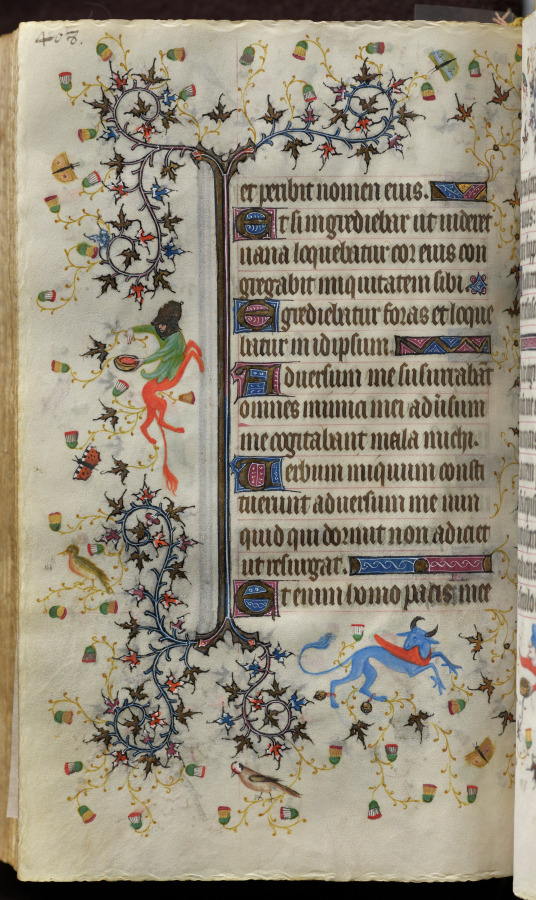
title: Hours of Charles the Noble, King of Navarre (1361-1425): fol. 198v, Text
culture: France, Paris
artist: Master of the Brussels Initials and Associates (French)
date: c. 1405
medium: ink, tempera, and gold on vellum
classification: Bound Volume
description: This precious volume was obviously highly prized by its owner, the French-born King of Navarre, who had his coat of arms painted on no less than twenty folios. Rather than directly commissioning this manuscript from a specific workshop, it seems that Charles the Noble acquired his book of hours -- perhaps ready-made for the luxury market -- while on a trip to Paris in 1404-05. A collaborative effort, six painting styles are evidenced within the pages of this codex, those of two Italians, two Frenchmen, and two Netherlanders. The painter who was responsible for the planning and decoration of the book, and who produced seventeen of the large miniatures, was a Bolognese artist known as the Master of the Brussels Initials. His principal assistant, responsible for most of the borders, was a Florentine who signed his name "Zecho" da Firenze on folio 208 verso.